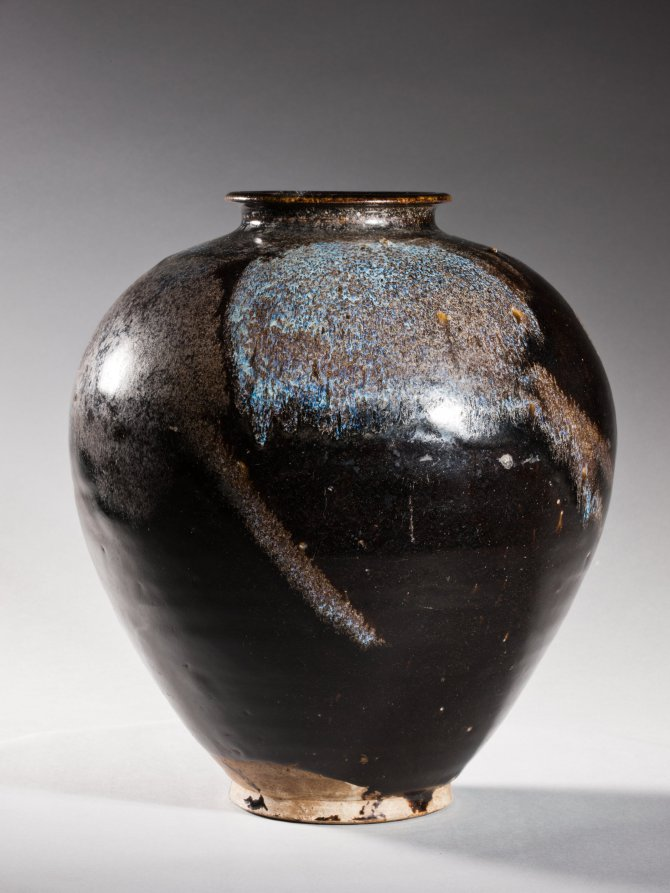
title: Jar: Black Ware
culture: China, Henan province, Huangdao kilns, Tang dynasty (618-907)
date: 700s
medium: glazed stoneware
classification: Ceramic